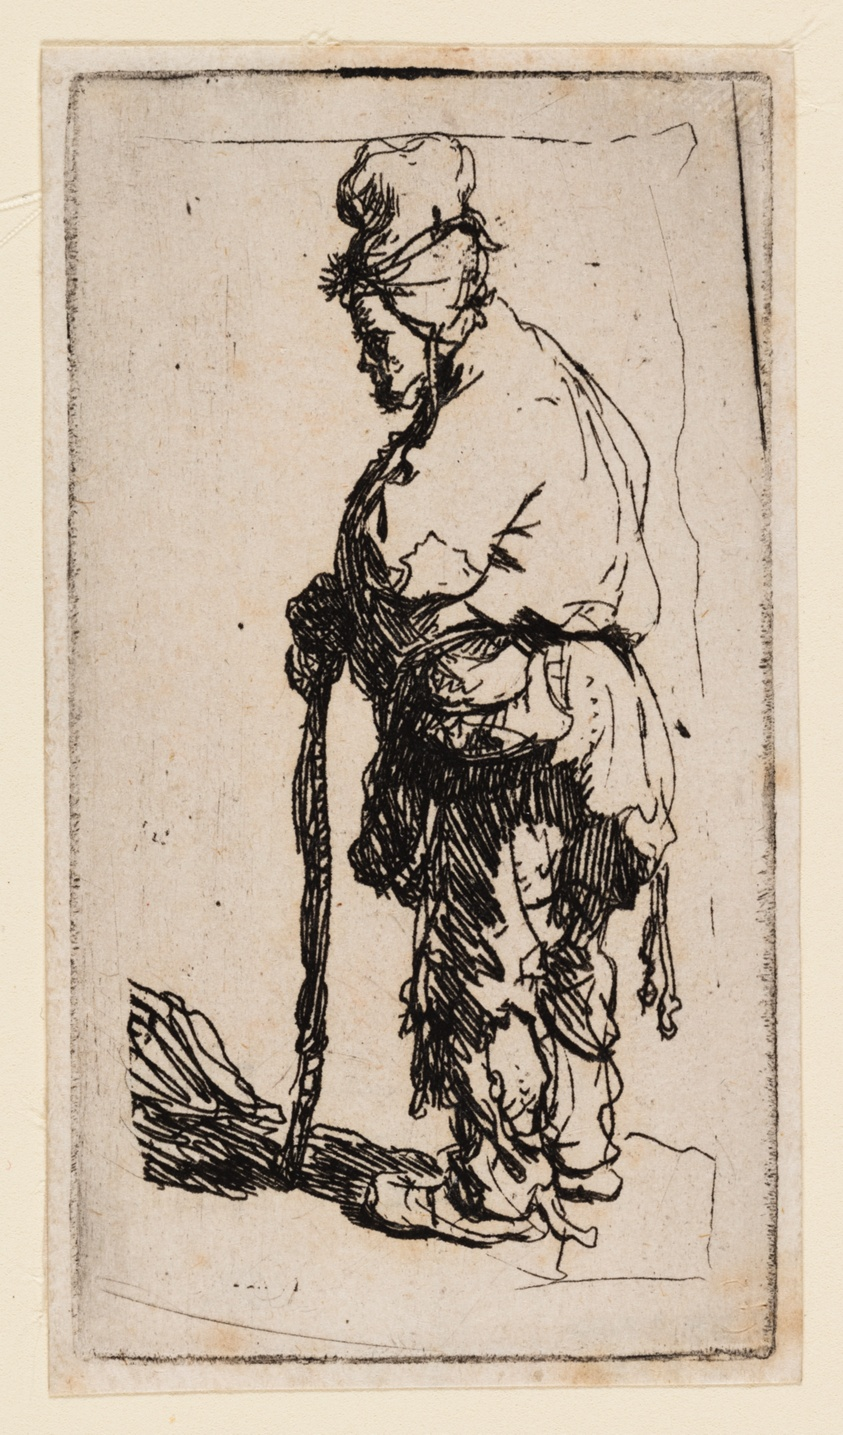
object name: Print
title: Beggar Leaning on a Stick, Facing Left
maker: Rembrandt van Rijn (Dutch, 1606-1669)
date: c. 1630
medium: Etching on ivory laid paper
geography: Holland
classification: etching; print; prints and drawing; paper